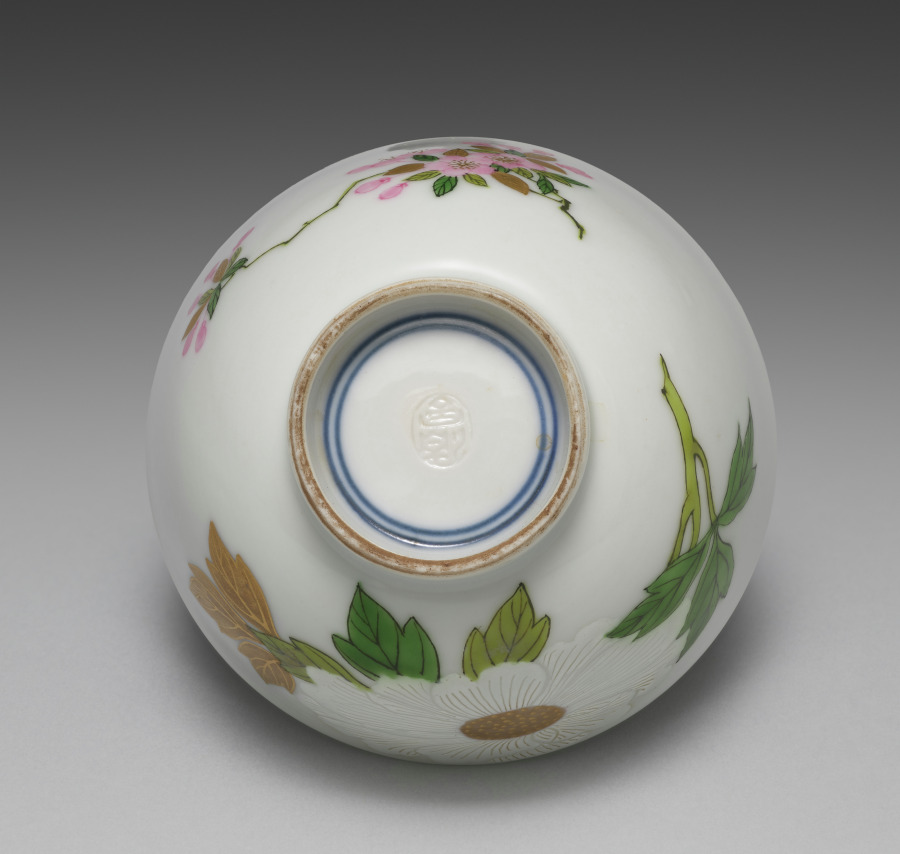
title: Teabowl from Teabowls with Peony and Crabapple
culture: Japan, Meiji period (1868–1912)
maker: Seifū Yohei III (Japanese, 1851–1914)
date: 1893–1914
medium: One from a set of five teabowls; porcelain with underglaze and overglaze color enamels and gold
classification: Ceramic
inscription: 清風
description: Overglaze color enamels are generally called iro-e (literally “color picture”) in the terminology customarily used for porcelain decoration of the Edo period. This set of teabowls is a fine example of Yohei III’s skilled use of the technique, which is identified on this set’s box lid with the alternate phrasing “porcelain with color painting” (jisaiga). Distinct from the way overglaze colors were used in Kakiemon ware from Arita, his designs and applications show a consciousness of porcelain decoration of the Qing dynasty. Here, he combines Chinese models with a sensibility taken from Kyoto ware precedents, including painting with powdered gold (kinrande). The colors used in the bowls are as follows: blue, black, gold, white, light green, green, and pink. The blue appears only inside the footring, as a double band of underglaze color. The black iron, used for stems and leaf veins, is painted over the glaze. The gold, also painted over the glaze, is used for leaves and the centers of flowers, for solid, glossy lines defining detail, or as a semimatte ground. The white of the peony flower is built up to a low relief over the glaze. Yohei has incised lines of varying widths into the pigment, carving away to the bowl’s surface, to differentiate individual petals and their rippled shapes. The light and dark greens, as well as the pink, are painted over the glaze. Of note is how Yohei has first used thinly applied lines of light green to draw the plum branch before applying the opaque iron black. For the plum buds and flowers, he has used a diluted pink with an opaque pink for outline, both over the glaze. In his later works, Yohei used pink both over and under the glaze in a manner similar to underglaze blue, and it can be challenging in some cases to discern which technique he has used. A lidded container in a private collection has a similar design but is augmented with the inclusion of white and purple magnolia blossoms. In contemplating the original decorative program of a set, of which these teabowls may have been a part, it is worth considering that perhaps not all objects included the full range of motifs. In such cases, the composition of the individual object may be best understood within the context of the extended ensemble. Here, the delicate pink plum on one side of the bowl seems slightly unbalanced with the bold white peony on the other, but when seen with other objects with the magnolia and its additional colors and shapes, it is possible to imagine a set with a complex, balanced design across multiple pieces.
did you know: Because four is considered an unlucky number, it became customary to assemble groups of guests of five or multiples of five.